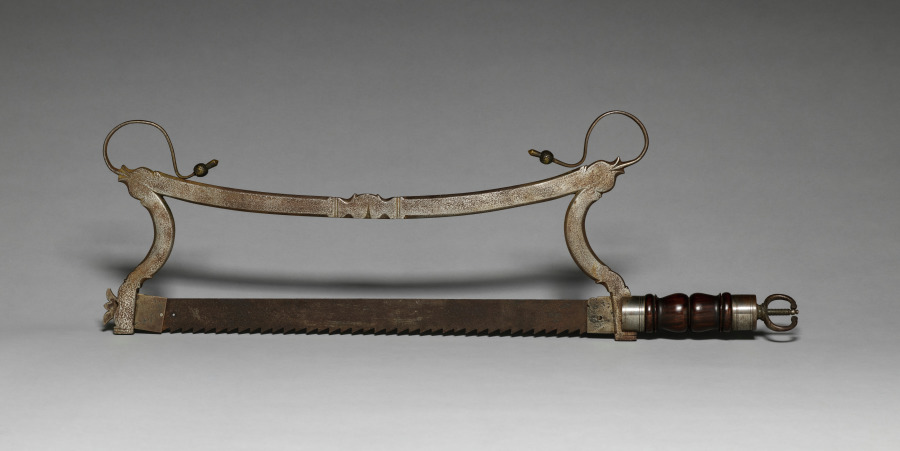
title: Hand Saw with Blade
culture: Europe, 17th century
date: 1600s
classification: Tool